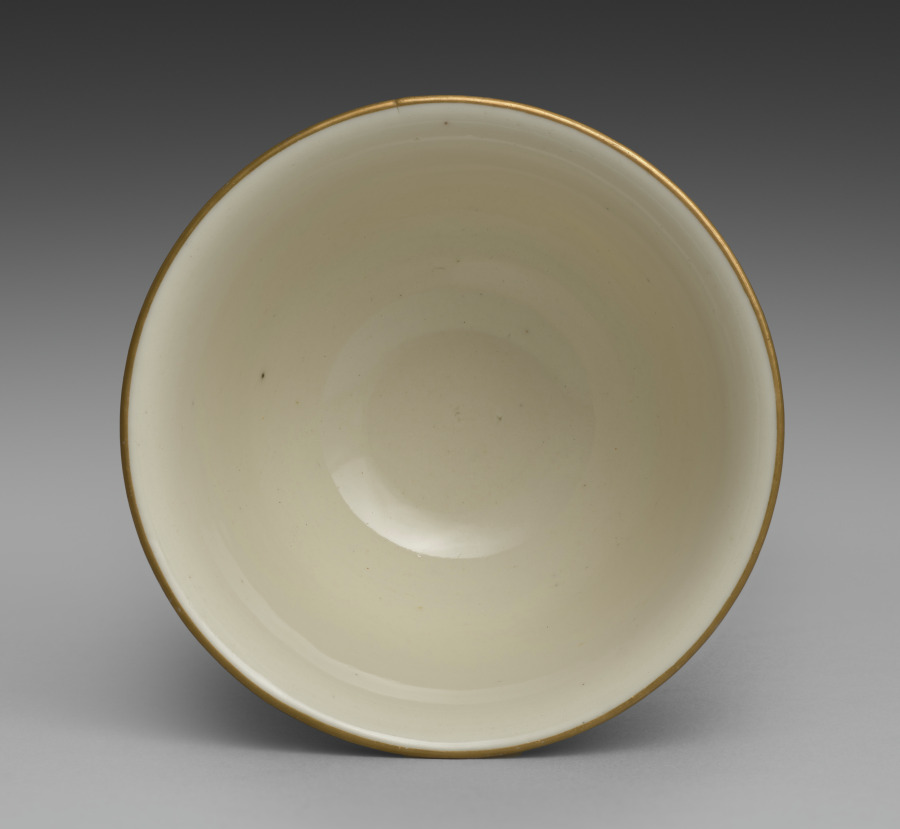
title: Drinking Cup from Dining Set with Plum Blossoms and Cracked-Ice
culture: Japan, Meiji period (1868–1912)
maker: Seifū Yohei II (Japanese, 1844–1878)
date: c. 1875–78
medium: Porcelain with molded designs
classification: Ceramic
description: Each item in this set has a delicate low-relief design of flowering plum branches over scattered, intersecting lines meant to resemble the cracked-ice surface of a frozen body of water and is signed on the base in gold pigment. While Yohei II produced many fine works in underglaze blue, like those produced by Kiyomizu Shichibei, he also made works in quite different styles later in his career, from the early 1870 s. In 1873, he was appointed purveyor to the Industrial Center of Kyoto Prefecture, a designation associated with Kyoto’s efforts to reach an international market through the port of Kobe; and from 1875 until his death, he was involved in national-level projects to present Japanese ceramics across the world. It was during this period that Yohei III was apprenticed to Yohei II, and it has been suggested that this set may in fact be an early example of Yohei III’s work, which he signed with his teacher’s name. Decorated with flowers resembling Japanese textile motifs, the set calls to mind the design of Yohei II’s pair of vases with plum blossoms in the Victoria and Albert Museum. Here, the elaborate trees created for a formal public exhibition setting have been translated into the approachable blossoms of the genteel domestic environment. While the designs are consistent across the pieces, each raised flower petal and pistil and each incised line in the ice was done by hand, so the cups, bowls, and dishes are similar yet unique. The bottoms of two boxes once identified the set’s owner, but the information has been deliberately obscured with black ink. However, inscriptions still visible appear to indicate two occasions, once at the end of July 1886 , and once again in June 1916 , when parts of the set were requested from Hokura in Niigata Prefecture. The location corresponds to a neighborhood in the present-day city of Jōetsu. The surname Tsuji 辻 also appears on a paper tag affixed to one of the box cloths. Future research may possibly reveal more about their provenance. A vase by Yohei III in a private collection combines the formal grandeur of the Yohei II vases in the Victoria and Albert Museum with the gentler design of this dining set, placing flowering plum trees against soft, scalloped-edge clouds resembling those in golden screens.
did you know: The dining wares have a creamy white coloration that the four boxes containing them identify as Korean in style.